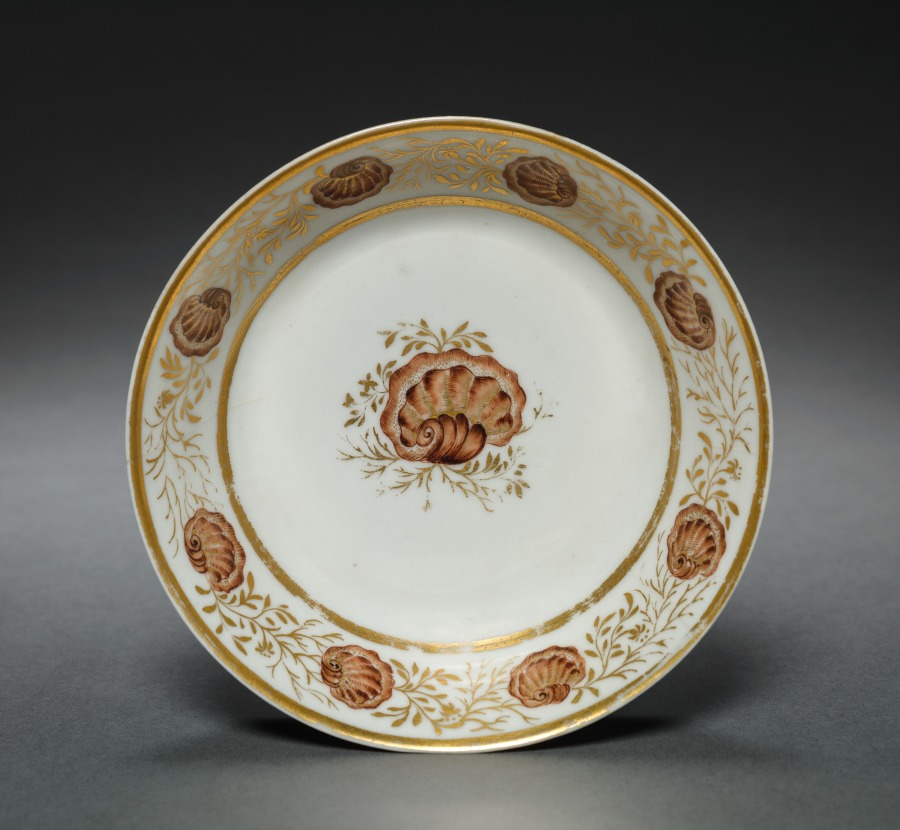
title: Saucer from Oliver Wolcott, Jr. Tea Service (3 of 6)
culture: Chinese Export porcelain, late 18th-early 19th century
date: 1785–1805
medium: porcelain, sepia enamel, gold leaf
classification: Ceramic